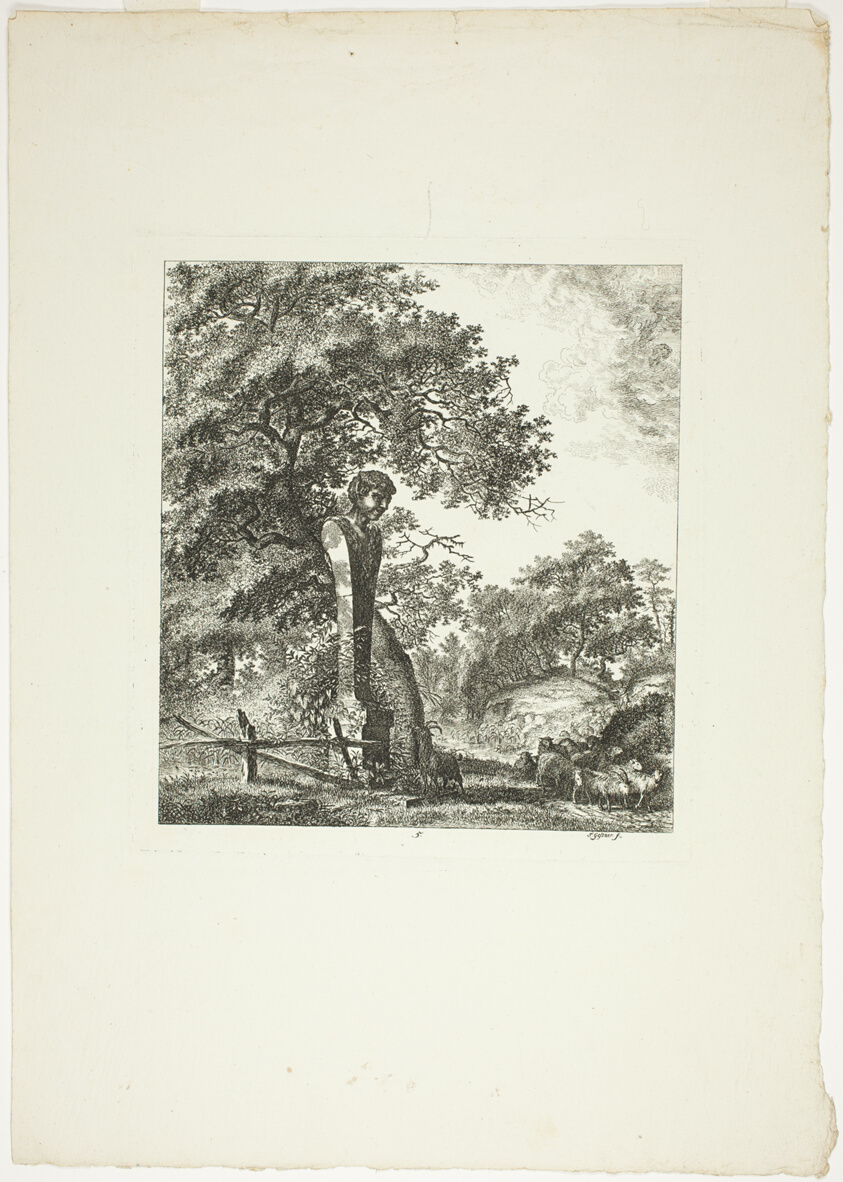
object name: Print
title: Sheep by a Statue of Pan, plate five from Paysages Dédiés à M. Warelet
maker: Salomon Gessner (Swiss, 1730-1788)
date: 1764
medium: Etching on cream laid paper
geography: Switzerland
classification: etching; print; prints and drawing